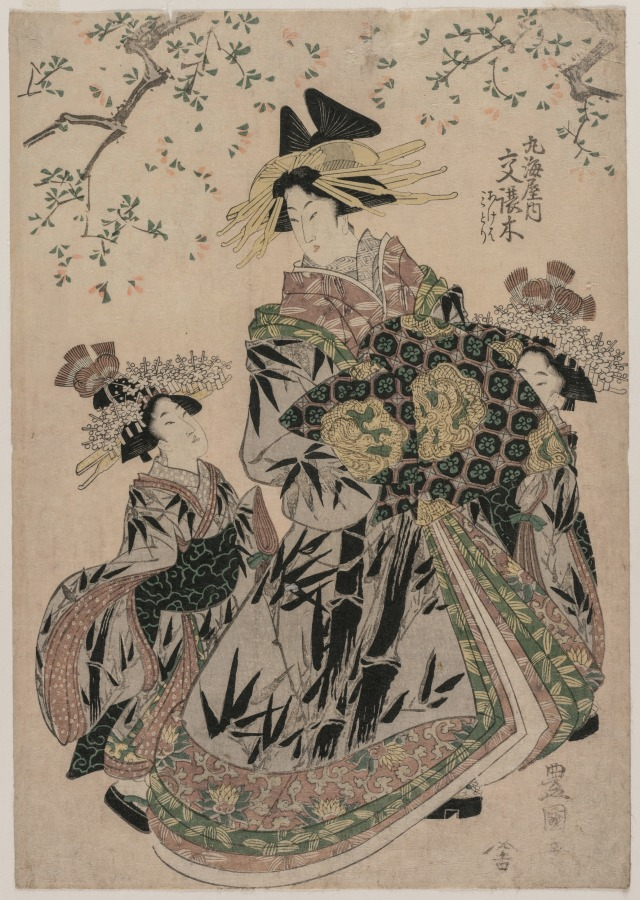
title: The Courtesan Katakoshigi (?) of Maruebiya with her Kamuro Ageha and Midori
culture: Japan, Edo period (1615–1868)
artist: Utagawa Toyokuni (Japanese, 1769–1825)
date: c. 1805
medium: color woodblock print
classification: Print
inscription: Signature: Toyokuni ga Publisher: Kagaya Kichibei (Kichi)